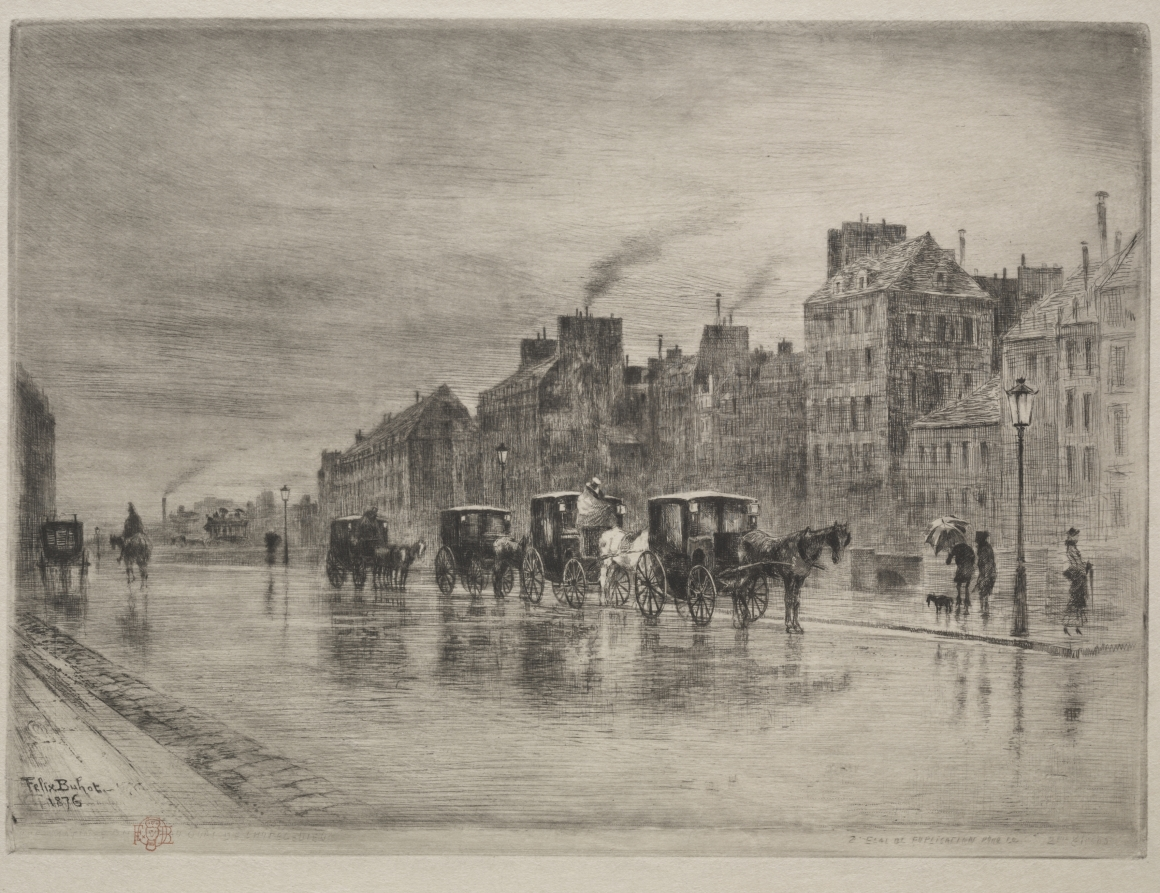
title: A Winter Morning on the Quai de l'Hôtel -Dieu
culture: France, 19th century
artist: Félix Hilaire Buhot (French, 1847–1898)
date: 1876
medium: etching, drypoint, aquatint and roulette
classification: Print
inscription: signed and dated, in plate: "Felix Buhot 1876"; lower right, in plate: "UNE MATINEE D'HIVER AU QUAI DE L'HOTEL-DIEU"; lower right, in plate: 2nd ETAT DU PUBLICATION [...]"